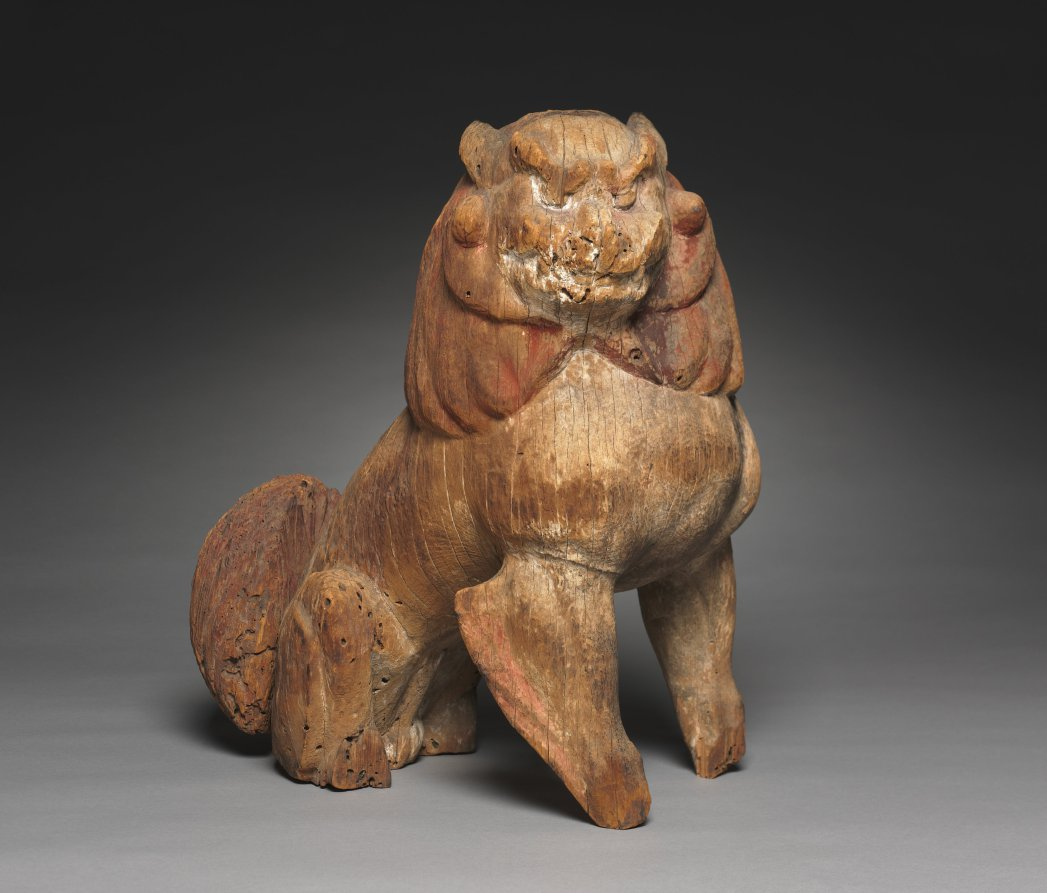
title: Guardian Animal: Komainu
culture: Japan, Kamakura period (1185–1333)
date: 1300s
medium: Wood with traces of color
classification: Sculpture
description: Placed at the entrance to shrines and temples in Japan, guardian figures ward off evil spirits. These guardians used to be painted red and white and are distinguishable by their facial expressions: the open-mouthed animal is a karashishi, or “Chinese lion,” while the close-mouthed beast, which once had a single horn protruding from its head, is called a komainu, or “Korean dog.” The mouths correspond to infinity, the syllables ah (open) and um (closed), or the alpha and omega. This pairing was widespread in ancient times in Chinese territories and likely found its way to Japan via kingdoms in Korea.